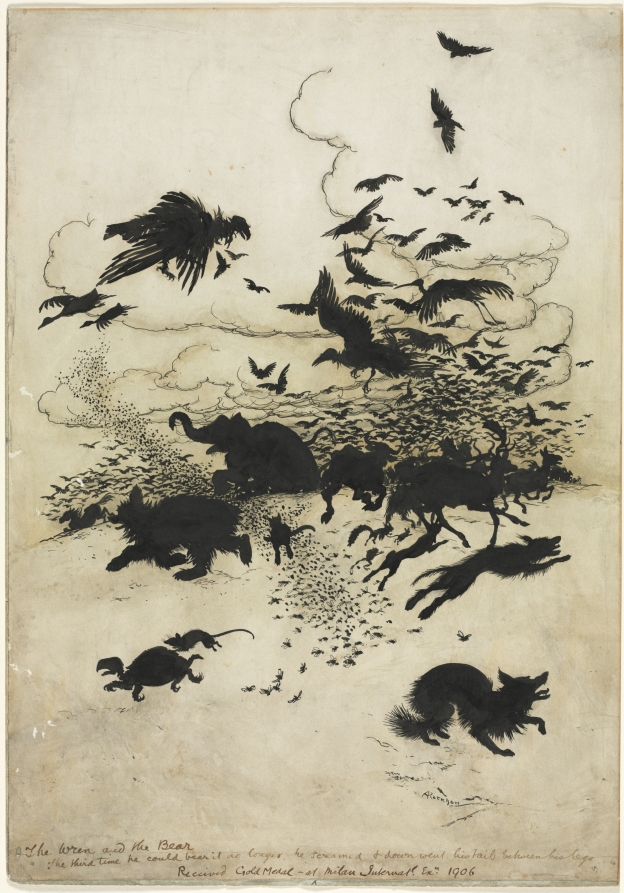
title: The Wren and the Bear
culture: England, early 20th Century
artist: Arthur Rackham (British, 1867–1939)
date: 1902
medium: brush and black ink and pen and black ink, with watercolor, on paper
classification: Drawing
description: The battle depicted here between flying and land animals is from the fairy tale “The Wren and the Bear.” The bear insults the wren, the king of the birds, leading to a war. Most of Arthur Rackham’s best-known illustrations combine intricate line work with delicate coloring. However, he also produced some silhouette illustrations like this one, created for a luxury edition of Fairy Tales of the Brothers Grimm. The illustration won a gold medal at the 1906 Milan International Exhibition, where it was exhibited as The Battle between the Air and the Earth.